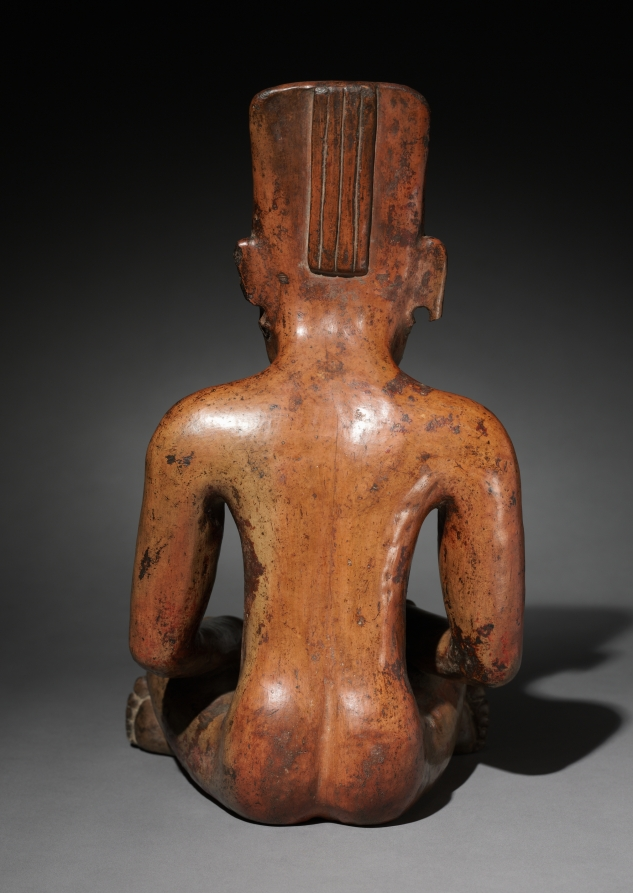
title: Seated Figure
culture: Mexico, Oaxaca, Zapotec style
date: 300 BCE–700 CE (thermoluminescence date, 285 BCE–515 CE)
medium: ceramic, slip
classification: Sculpture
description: The most famous Zapotec tomb ceramics are elaborate figural urns flanked by smaller, simpler companions similar to this one. Like other companions, this example probably belonged to a set of nearly identical figures; two others remain in Mexico. The identity of ceramic tomb figures-whether elite humans, royal ancestors, or deities-is still debated. The Zapotec developed one of Mesoamerica’s earliest writing systems, evidenced by the hieroglyphs on the headdress and chest. These are the names of calendar days, "13 Water" and "13 Flint Knife," respectively. Because people were named after the day on which they were born, one hieroglyph may identify the figure.